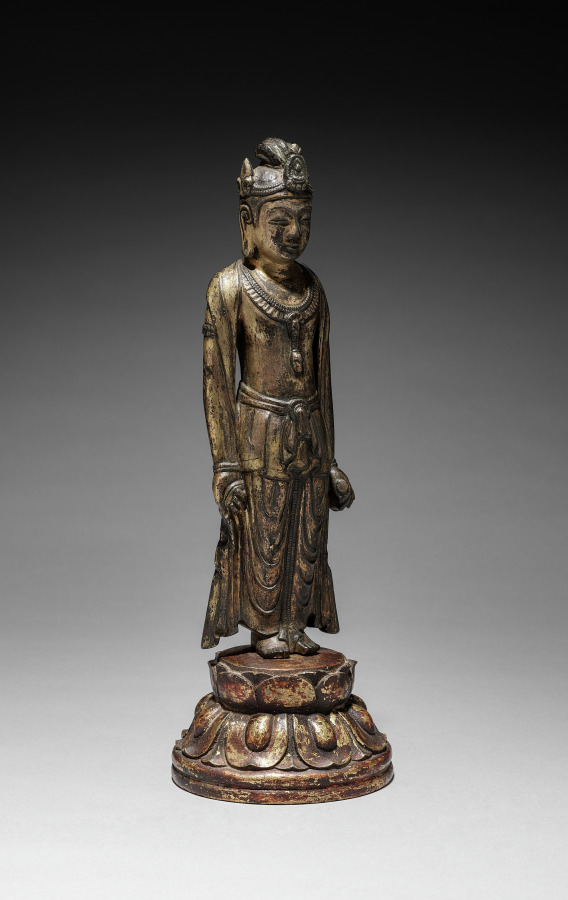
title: Kannon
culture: Japan, Asuka period (538–710)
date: mid-600s–early 700s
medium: gilt bronze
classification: Sculpture